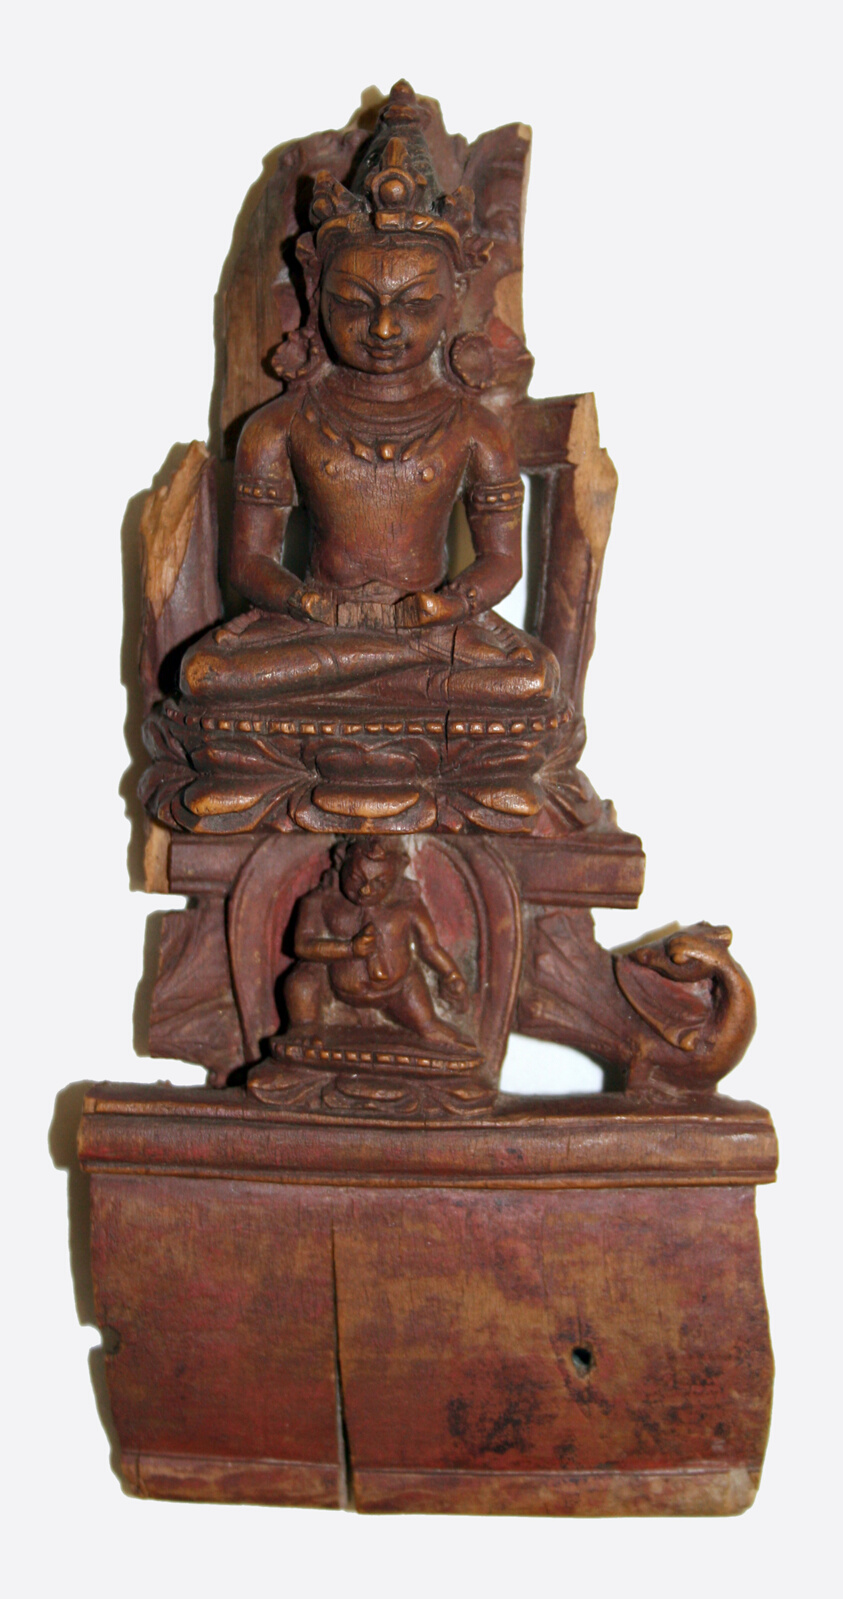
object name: Sculpture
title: Fragment Depicting a Tathagata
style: Himalayan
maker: Western Tibet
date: 12th century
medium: Wood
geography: Western Tibet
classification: wood; sculpture